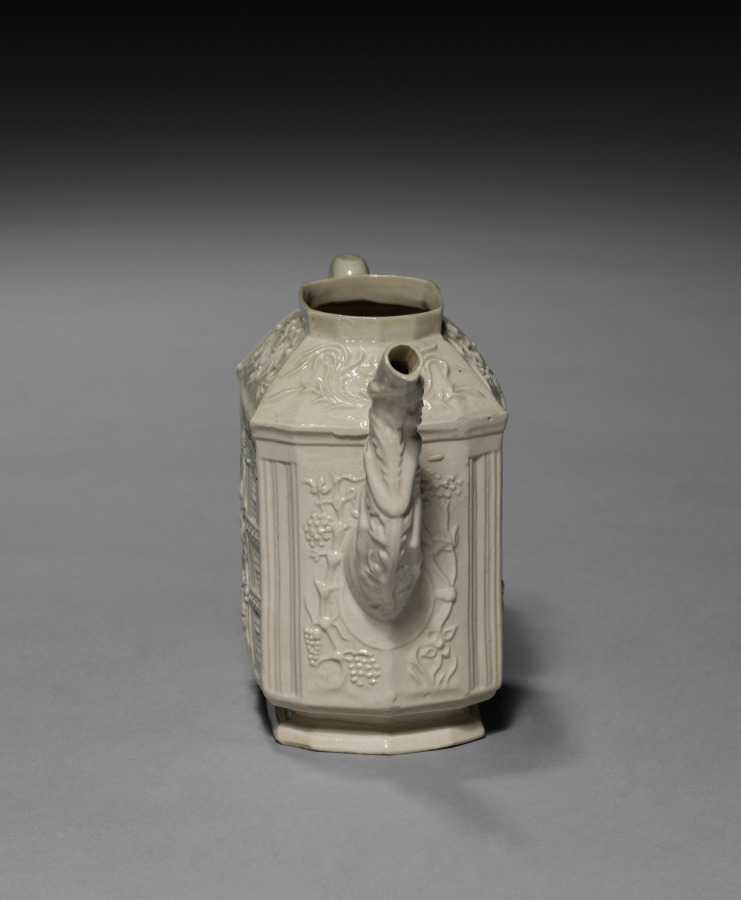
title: Teapot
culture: England, Staffordshire, 18th century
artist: Staffordshire Factory (British)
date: c. 1745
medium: salt-glaze earthenware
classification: Ceramic